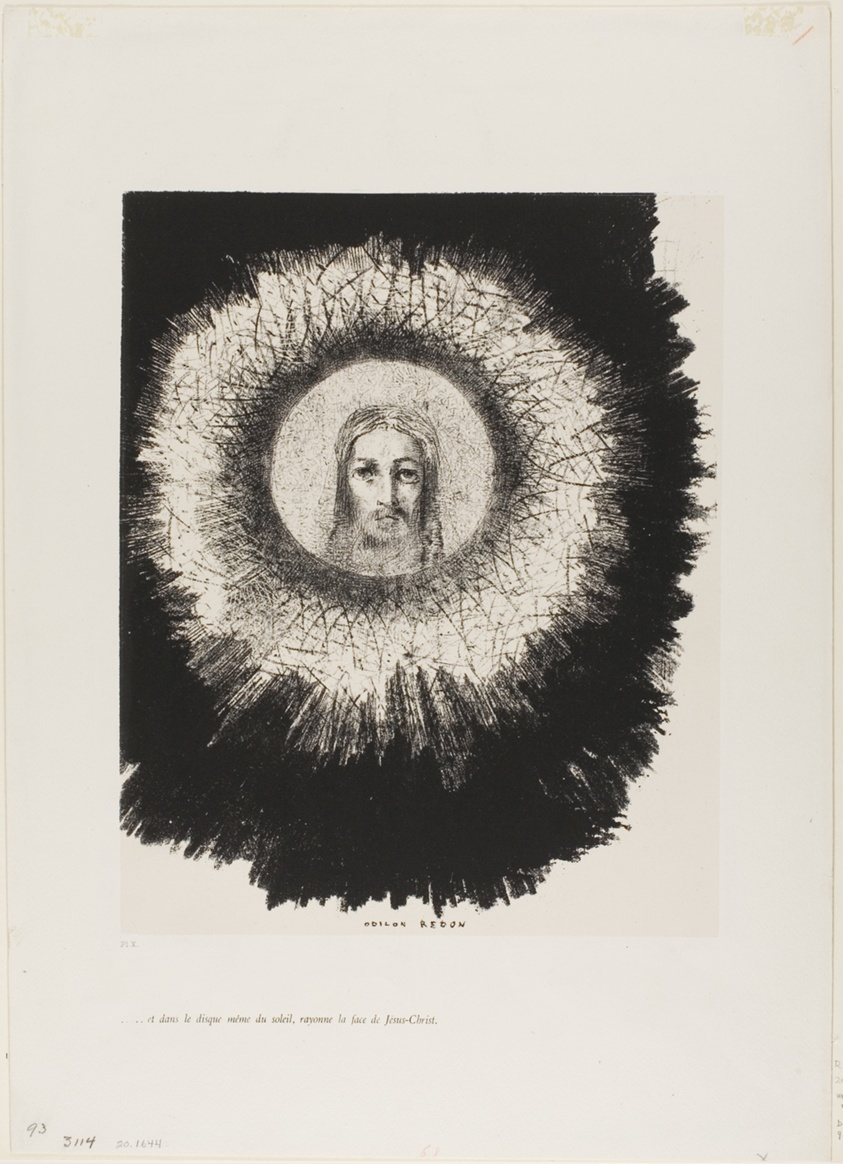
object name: Print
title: And in the Very Disk of the Sun Lights the Face of Jesus Christ, plate 10 from The Temptation of Saint Anthony (1st series)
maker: Odilon Redon (French, 1840-1916)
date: 1888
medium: Lithograph in black on ivory China paper, laid down on ivory wove paper (chine collé)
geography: France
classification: lithograph; print; prints and drawing; paper